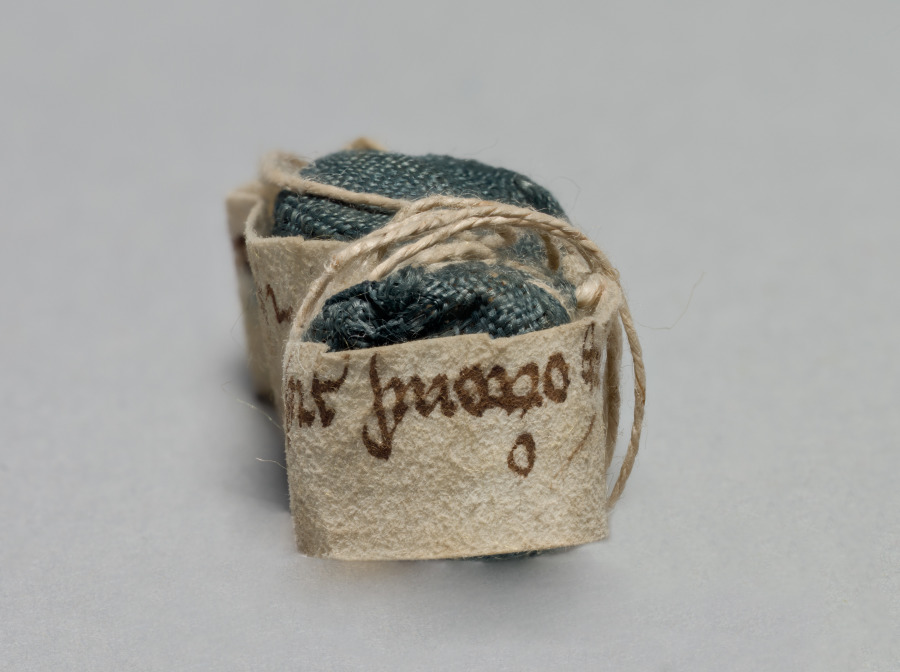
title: Relic of St. Adelaide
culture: Germany, Lower Saxony?, Romanesque period, 11th century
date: c. 1045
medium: bone, plain weave blue silk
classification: Metalwork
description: This relic is housed inside of the portable altar commissioned by Countess Gertrude of Brunswick, one of the Guelph Treasure’s earliest and most sumptuous objects.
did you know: This bone is thought to belong to a finger (metacarpal) although the curve is too prominent for a human. An exact determination can't be made without unwrapping it.